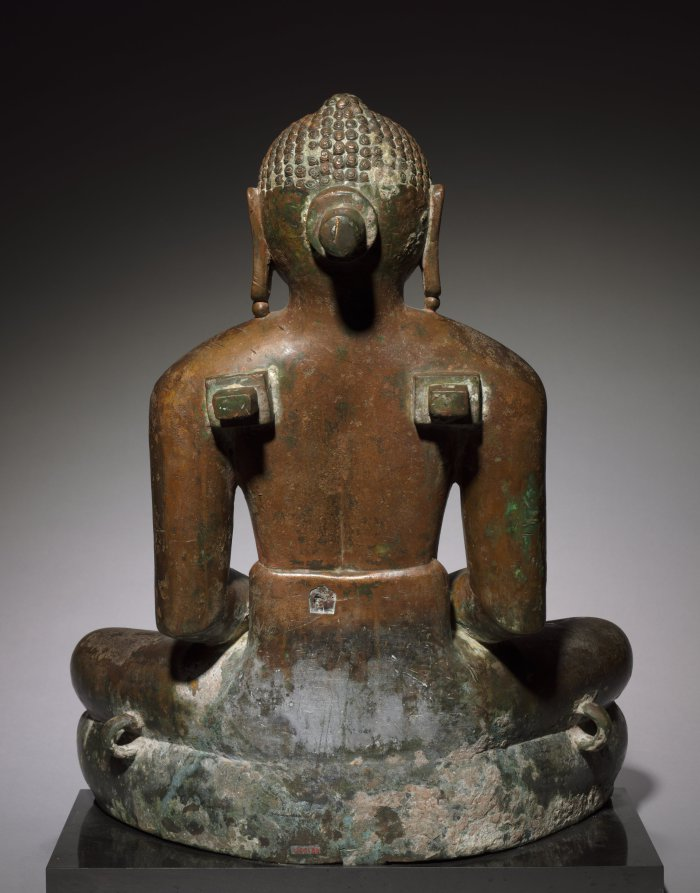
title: Jina (Tirthankara)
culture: India, Rajasthan, Medieval period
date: 900s–1000s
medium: bronze with silver inlay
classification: Sculpture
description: Jainism was one of the three major religions to evolve in India, the other two being Hinduism and Buddhism. While each religion developed its own particular characteristics, their beliefs maintained a common ground with Hinduism. In both Jainism and Buddhism, deities symbolize enlightened beings whose example is meant to inspire believers in following the path toward salvation rather than worshipping them. In Jainism the most common deities are Jinas (meaning "liberators" or "victors"), also known as Tirthankaras ("holy men"). As the name implies, they are beings "liberated" through enlightenment from the cycle of rebirth. There are 24 of these Jain patriarchs. This sculpture represents one of the 24 Jinas, but the absence of attributes makes it impossible to determine which one. This is not surprising since Jinas tend to look alike. Although this figure wears a cloth around his waist, Jinas are usually shown naked—a reference to their renunciation of worldly goods—and seated cross-legged in the posture of meditation (dhyanasana) with their hands resting in their laps (in the dhyana mudra), palms turned upward. Their physical appearance is always the same: broad shoulders, tapering torso, and long, highly stylized limbs. The head, with its round face and short-cropped curls, has a small protrusion at the top. The facial expression conveys self-assurance, wisdom, and compassion. Such a figure would usually have a halo attached to the back of the head. The present bronze dates to a time when some of the finest Jain sculptures and monuments were produced in India, as documented by such temples as Mt. Abu in Rajasthan (the area where this sculpture originated), Khajuraho in Madhya Pradesh, or Srivana Belgola in Karnataka.